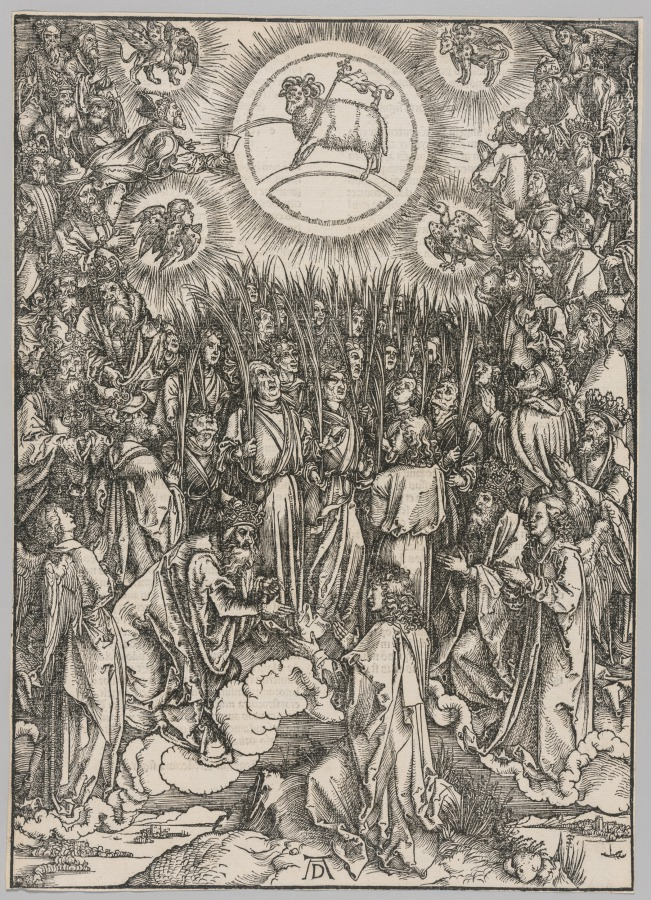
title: Apocalypse: The Adoration of the Lamb—The Hymn of the Chosen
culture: Germany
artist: Albrecht Dürer (German, 1471–1528)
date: c. 1496–97, printed 1511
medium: woodcut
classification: Print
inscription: On plate, lower center, monogram: AD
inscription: Verso: in graphite: lower left: 167; lower center: B167.; lower right, in ink: No. 13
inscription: Verso: Two columns of Latin text